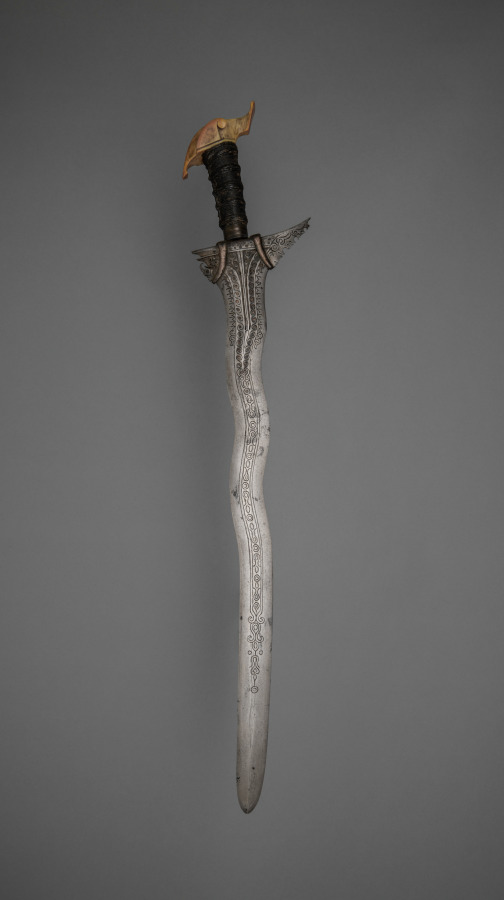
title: Sword (Kalis or Sundang)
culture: Philippines, Mindanao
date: before 1916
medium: Metal blade with ivory pommel and cord-wound grip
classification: Arms and Armor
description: This sword’s blade is straight near the tip and transitions into gentle undulations toward the lower half. Fine inlaid geometric and floral motifs run along the central ridge. The ivory pommel takes the form of a cockatoo (kakatua), a high-status motif in southern Philippine weaponry. The curving blade form, intricate inlay, and ivory pommel make this a prestige weapon.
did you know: The part wavy, part straight blade form is known as a kalis taluseko.